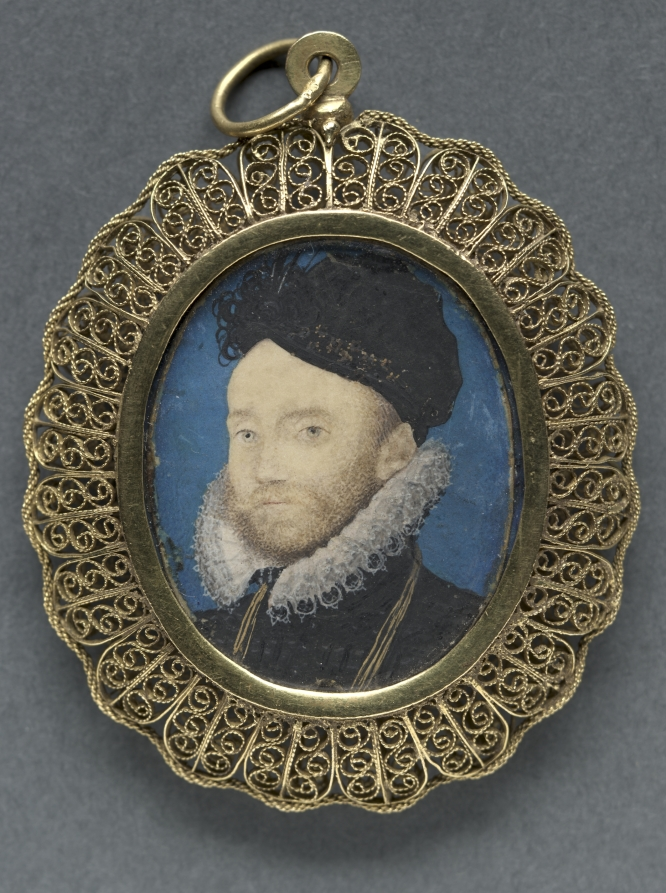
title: Portrait of a Man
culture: England, late 16th century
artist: Nicholas Hilliard (English, c. 1547–1619)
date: 1590s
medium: watercolor on vellum in a later gilt metal frame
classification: Portrait Miniature